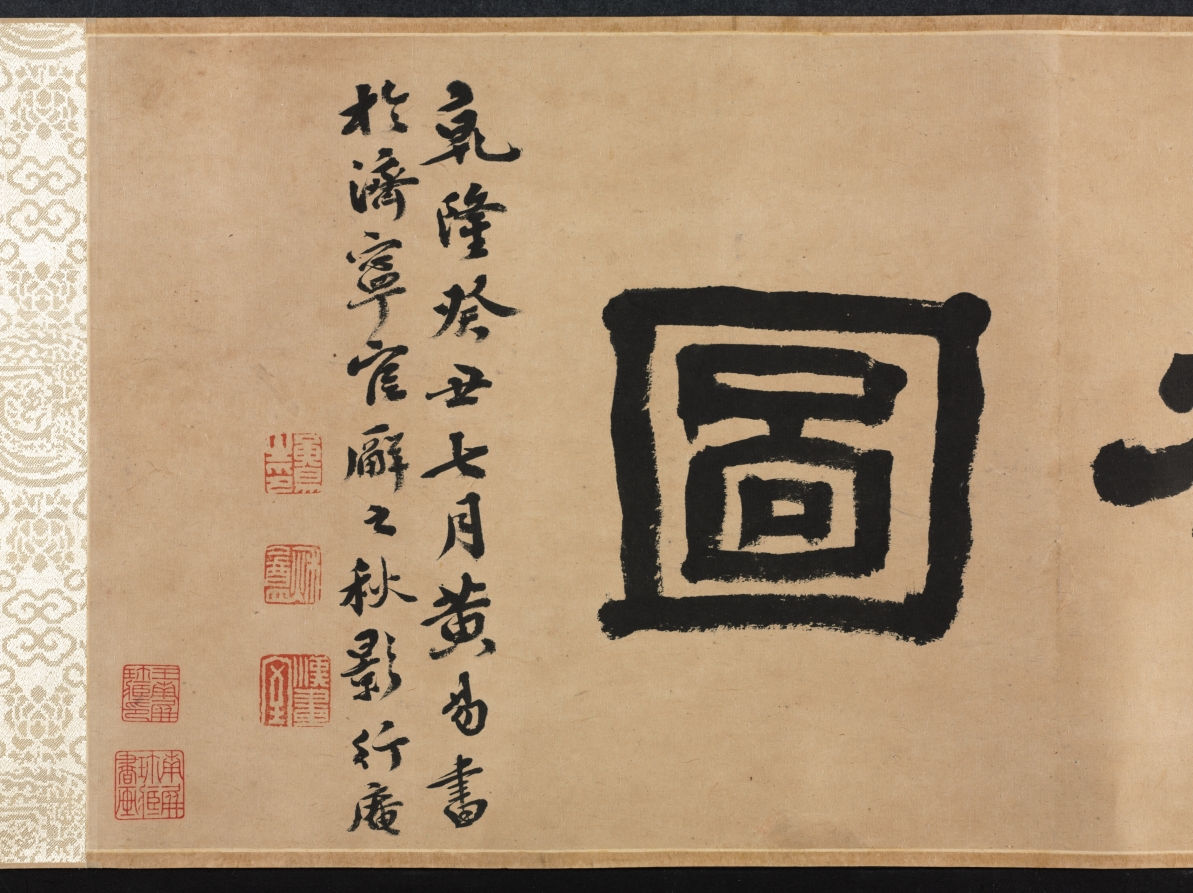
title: Dream Journey among Rivers and Mountains, no. 90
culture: China, Qing dynasty (1644-1911)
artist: Cheng Zhengkui (Chinese, 1604–1676)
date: 1658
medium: Handscroll; ink and color on paper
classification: Painting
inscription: 江山臥遊圖其九十, 青溪道人, 戊戌夏五。 [印] 程正揆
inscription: Title and inscription by Huang Yi 黃易 (1744–1802), and 3 seals.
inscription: 1 colophon and 9 additional seals: 3 seals of Dai Zhi 戴植 (active about 1821–1850); 1 colophon, dated 1914, and 3 seals of Yan Shiqing 顏世清 (1873–1929); 3 seals of Wang Nanping 王南屏 (1924–1985).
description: Cliffs and waterfalls interspersed with trees and dotted vegetation are spread over this handscroll. Long paths wind their way through villages, beside cottages, shrines, and over bridges. In the past, Chinese literati officials liked to take a “dream journey” along mountains and rivers when viewing landscape paintings in their studios. Scenery of this kind thus became a way to escape from the world of bureaucracy and administration. The painter Cheng Zhengkui used the title “Dream Journey” for a whole series of paintings, of which this is number 90. He is said to have painted 500 of them, but the actual count remains unknown.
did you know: Cheng Zhengkui planned to make 100 dream journey paintings but may have ultimately made 500.